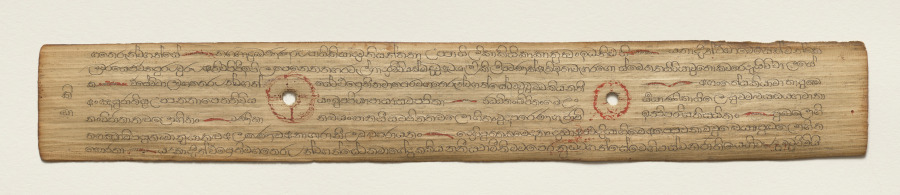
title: Leaf from a Buddhist Manuscript (recto)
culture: Sri Lanka, Singhalese, Late 17th century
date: c. 1700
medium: fiber paper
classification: Manuscript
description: Palm leaf material is still used for manuscripts in Sri Lanka. The palm leaves are prepared first by boiling them, drying them in the sun, and then rubbing them with oils. Scribes then use a metal stylus to incise the text. Then charcoal powder is wiped across the pages, filling in only the inscribed lines.